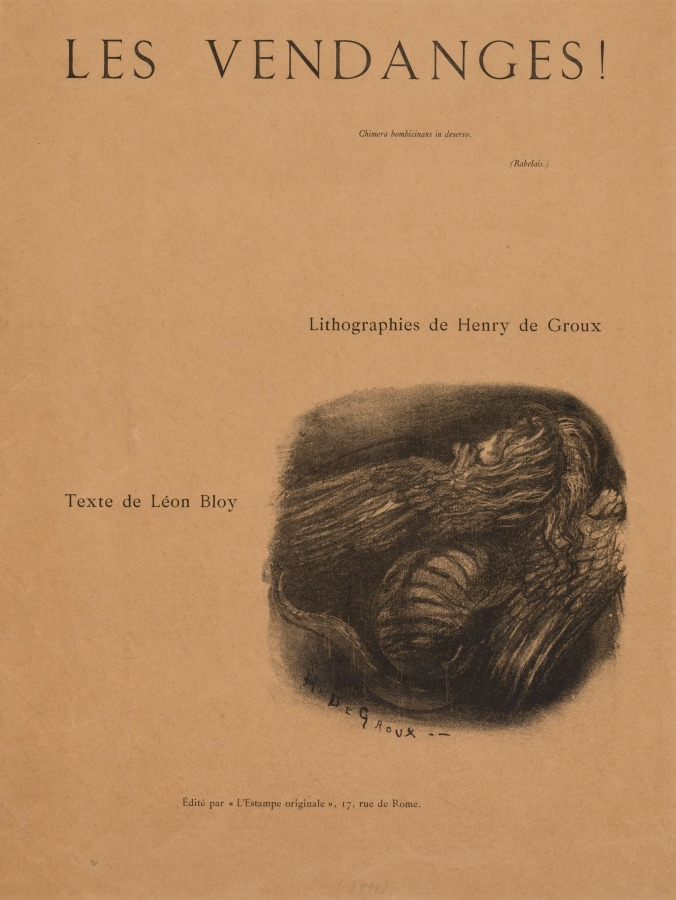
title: The Vintages!: Title Page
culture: Belgium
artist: Henri de Groux (Belgian, 1867–1930)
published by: Proof from an unpublished suite of lithographs intended to be published by L'Estampe Originale, 17, rue de Rome.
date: 1894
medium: lithograph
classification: Print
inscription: signed in stone: "H. de Groux"